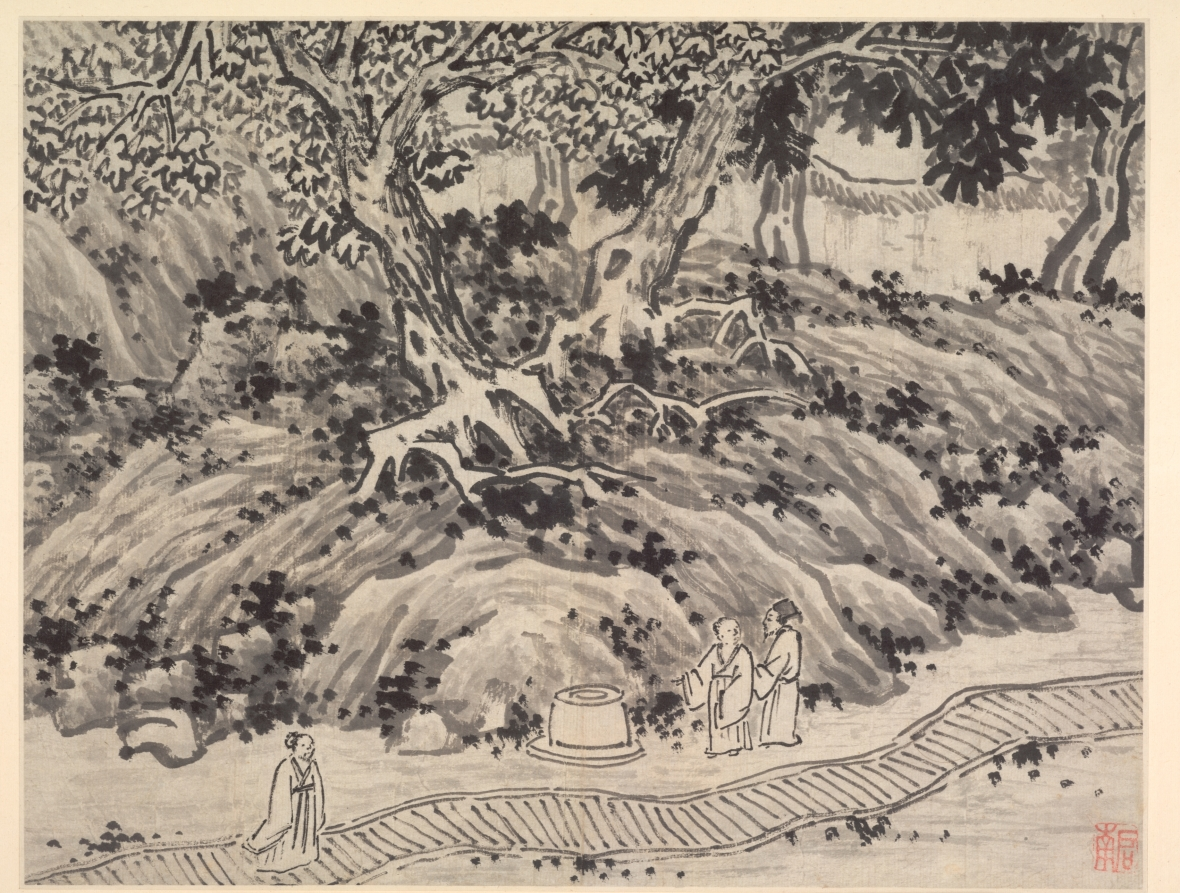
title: The Fool's Spring, from Twelve Views of Tiger Hill, Suzhou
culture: China, Ming dynasty (1368–1644)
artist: Shen Zhou (Chinese, 1427–1509)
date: after 1490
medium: Album leaf; ink on paper or ink and slight color on paper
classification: Painting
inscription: [印] 启南; 石田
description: Views of Tiger Hill depicts a historic site a few miles northwest of Suzhou. The scenes simulate a visit from arriving by boat at the foot of the mountain to climbing to Cloudy Cliff Monastery. Representations of the artist’s mature style, Shen Zhou included views in subtle colors in the suite of monochrome scenes. A Suzhou native, Shen Zhou was supported by family wealth and rejected an official career in favor of life as a retired scholar. Turning to painting in midlife, he is regarded as the founder of the Wu School of painting, with its center in Suzhou.